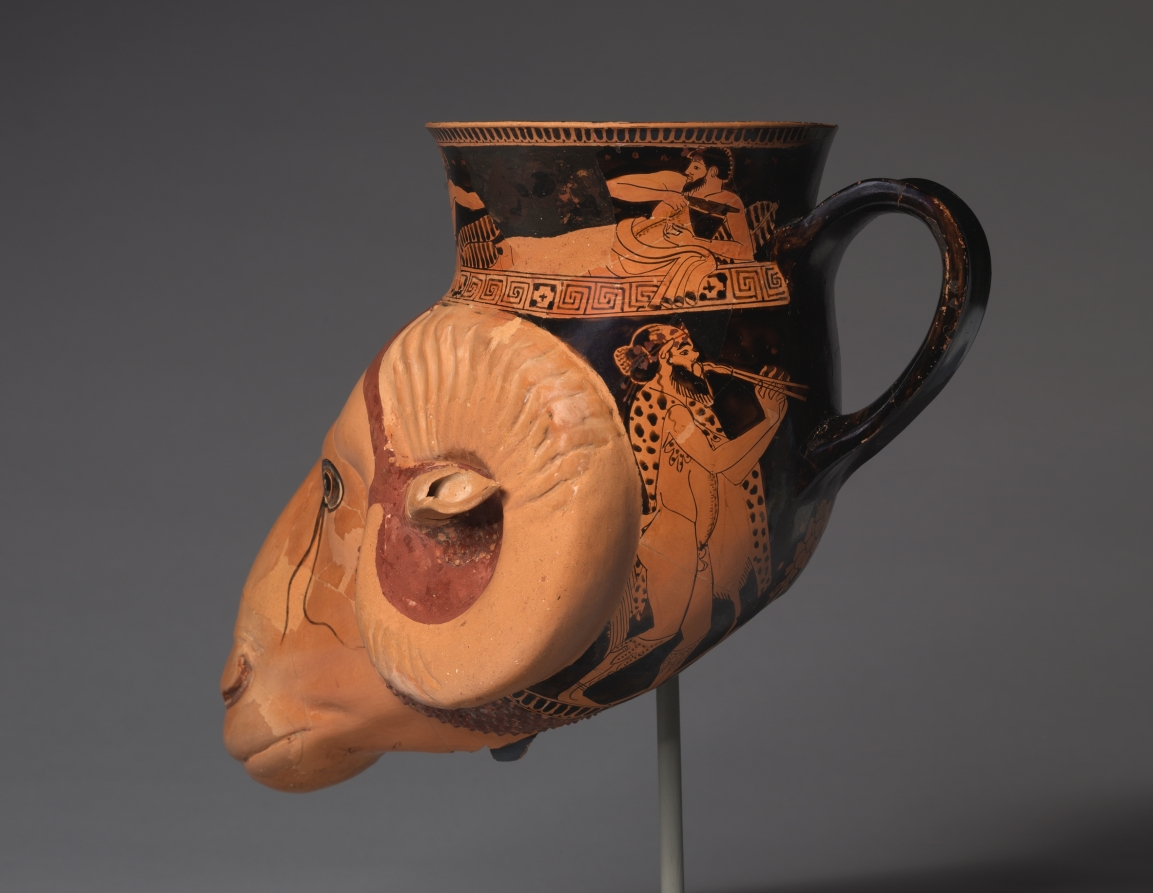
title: Red-Figure Ram-Head Rhyton (Drinking Vessel): Symposiasts; Satyr and Maenad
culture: Greek, Attic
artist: attributed to Brygos Painter (Greek, Attic, active c. 490–470 BCE)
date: c. 480–470 BCE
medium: ceramic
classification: Ceramic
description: Although now missing nearly half of its mold-made ram’s head, this rhyton, a kind of drinking horn, retains most of its painted red-figure sections. On the wheel-made bowl above, three symposiasts recline at a drinking party: a youth wearing a kidaris (flapped Scythian hat) and two bearded men holding drinking cups. The youth plays the pipes, while a lyre hangs nearby and one man throws his head back in song. The letters around them, which do not spell out known words, may allude to the music in the air. Flanking the handle are a pipe-playing satyr and a dancing maenad (only partially preserved).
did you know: This vessel once had a foot, but only a bit of its stem remains.